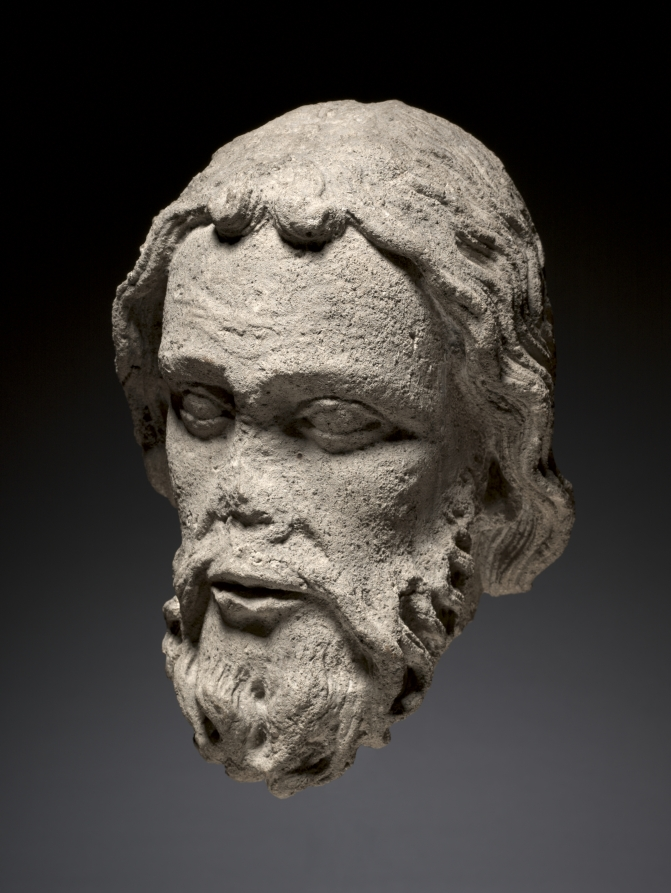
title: Head of an Apostle from the South Portal of the Cathedral of Thérouanne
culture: Northern France (Pas-de-Calais), Thérouanne, 13th century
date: c. 1235–1240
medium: oolitic limestone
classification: Sculpture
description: These monumental stone heads are among the substantial known remains of the sculptural program of Thérouanne’s cathedral, which was razed by Emperor Charles V of Spain in June 1553. These heads were found in a wall of rue Ste. Croix in the town of Saint Omer (a short distance to the north) in January 1923. This group of sculptures from the gable of the south portal of Thérouanne, which includes a stylistically related Christ as Judge, is recorded to have been moved to the Cathedral of Saint Omer in 1554. With their deeply carved wavy hair, curly beards, wrinkled foreheads, and ponderous facial features, these imposing heads—even in their now fragmentary and weathered state—attest to the powerful monumentality of the stone sculpture covering French church facades of the Gothic period.